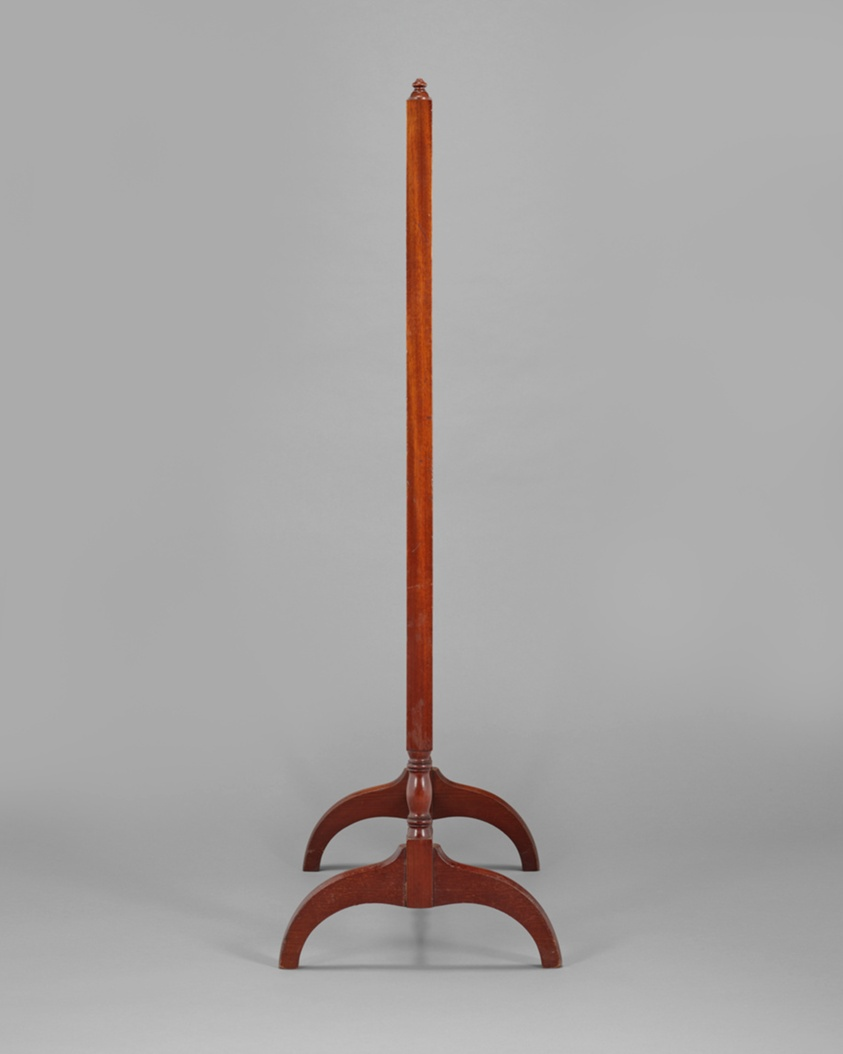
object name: Coverings and Hangings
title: Flowerpot Fire Screen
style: Arts and Crafts Movement, 19th century, british, British Arts and Crafts Movement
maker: Designed by William Morris (English, 1834-1896); Produced by Morris & Co., London (English, 1875–1940)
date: Design early 1880s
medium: Wood, cotton or linen ground, silk floss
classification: embroidery; fire screen (furniture); textile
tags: flowers, vase, foliage